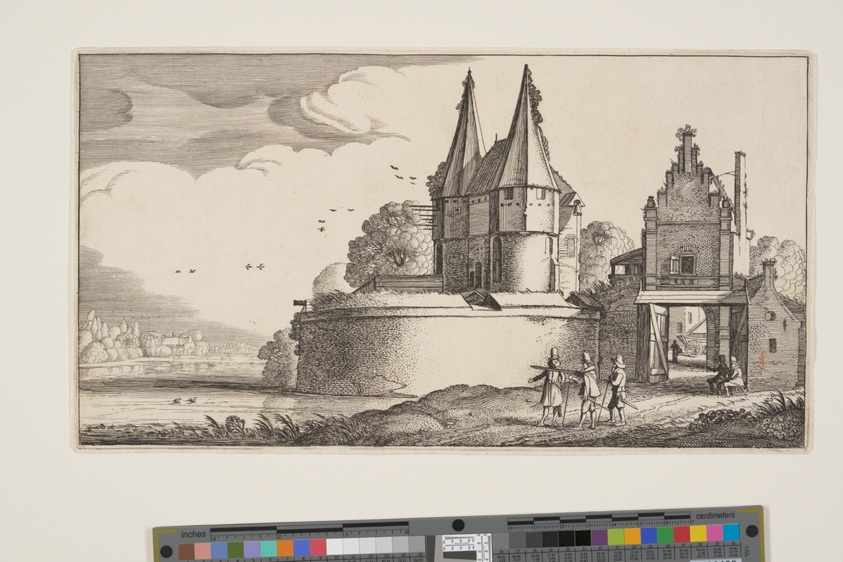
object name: Print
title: Bastion and Town-Gate on a River, from Landscapes (Playsante Lantschappen)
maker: Attributed to Claes Jansz. Visscher II (Dutch, 1586-1652); after Jan van de Velde II (Dutch, c. 1593-1641)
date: c. 1641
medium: Etching, with engraving, on ivory laid paper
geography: Netherlands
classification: etching; paper; print; prints and drawing